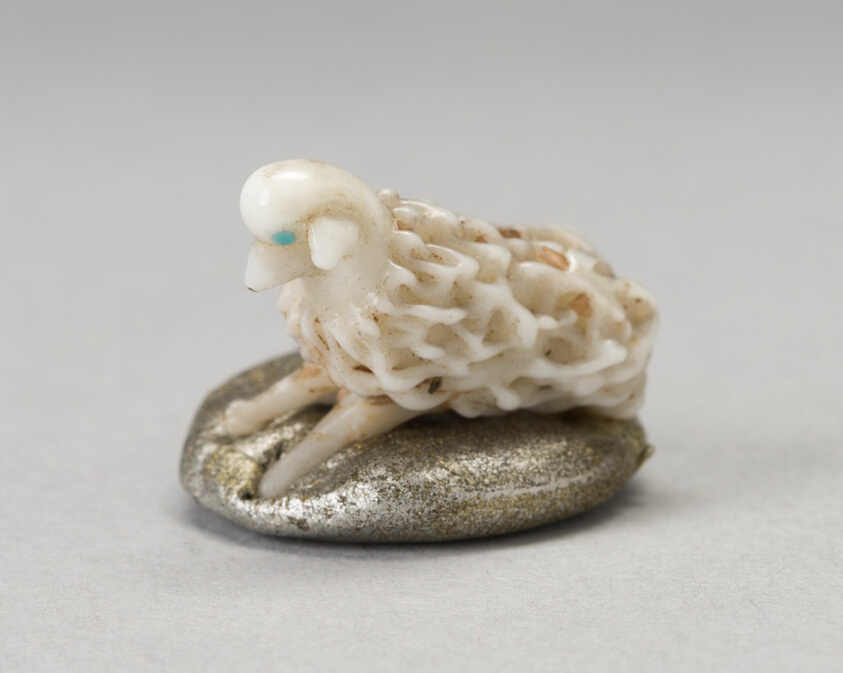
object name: Glass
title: Sheep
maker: Nevers, France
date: 18th century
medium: Glass; lampwork (verre de Nevers), metal armature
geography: France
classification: glass; miniature; decorative object/ornament; european decorative arts